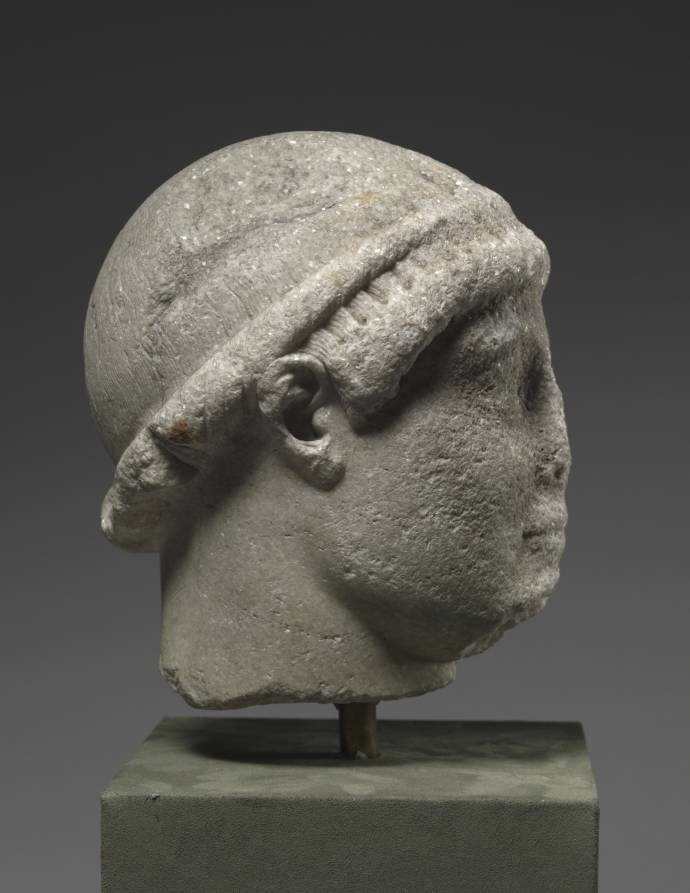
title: Head of Youth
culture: Sicily(?), Greek, Severe period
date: c. 470 BCE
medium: marble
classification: Sculpture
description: Although the face is now badly broken and quite weathered, this head was originally of high-quality workmanship, as can be seen in the extremely fine carving of the wavy hair preserved at the top and back. The slight asymmetry of the neck and facial features suggest that the head, which likely belonged to a full-bodied sculpture just under life-size, turned gently to one side.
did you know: The Severe style, named for its sober simplicity, marks the beginning of the Greek Classical period, c. 480–450 BC.